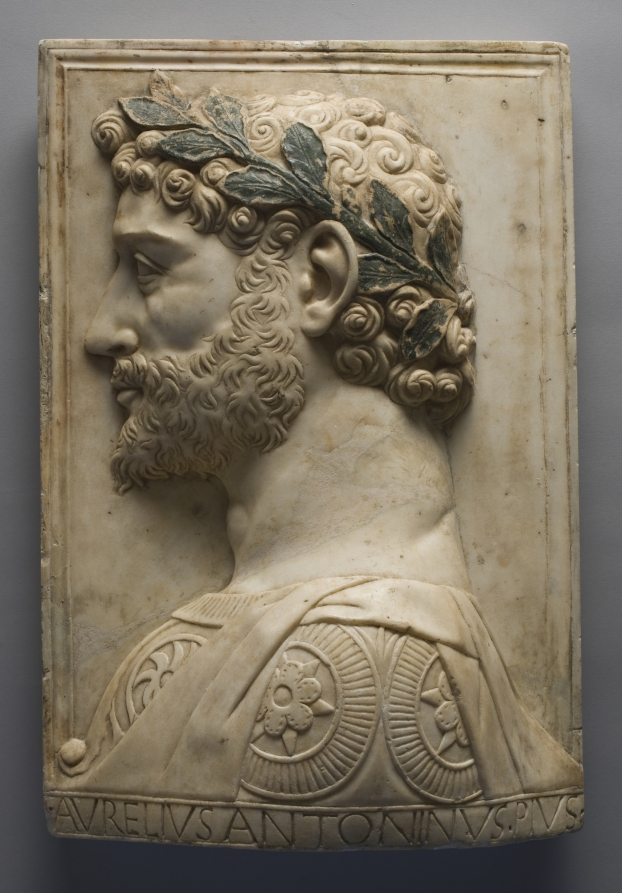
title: Aurelius Antoninus Pius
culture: Italy, Lombard School, late 15th century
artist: Gregorio di Lorenzo (Italian, c. 1436–1504)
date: late 1400s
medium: marble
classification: Sculpture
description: A laurel wreath rests on this Roman emperor’s finely articulated corkscrew curls, underscoring his military triumphs. While many ancient and classically inspired marble sculptures were painted, the survival of pigments is rare. In addition to the vibrant green coloring, traces of gold also remain on the leaves.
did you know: The artist can be identified by his distinctive flame-shaped curls forming the beard.